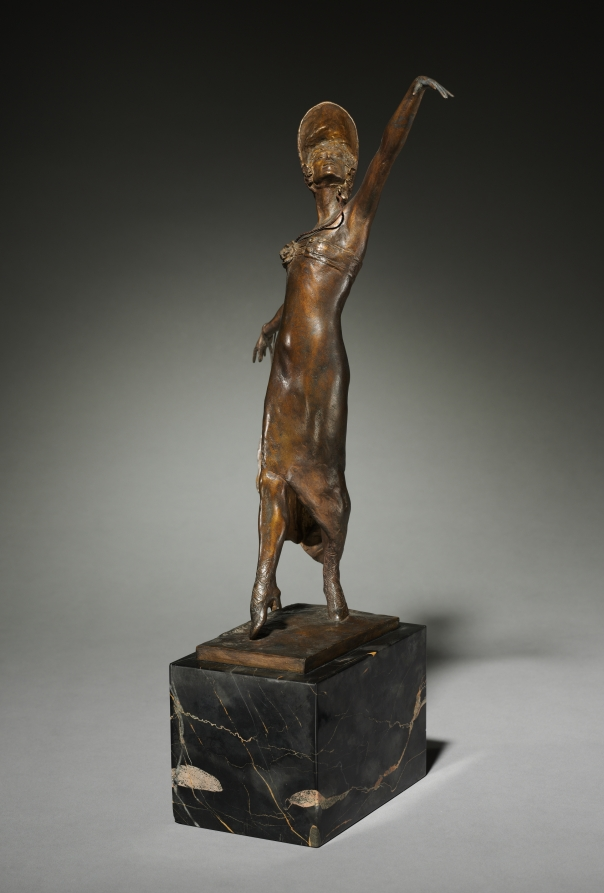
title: Pavlova Dancing the Gavotte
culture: America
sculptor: Malvina Hoffman (American, 1887–1966)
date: 1915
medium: bronze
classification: Sculpture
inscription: Signed on base: "Malvina Hoffman 1915, IX ©"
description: Sculptor Malvina Hoffman met the acclaimed Russian ballerina Ana Pavlova in New York during the spring of 1914. This bronze rendering of the dancer, posed with broadly outstretched arms, was created the following year. At the time, Pavlova was attempting to popularize a Russian version of the French folk dance known as the gavotte.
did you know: A pavlova is a meringue-based dessert inspired by the shape of ballerina Anna Pavlova's tutu.